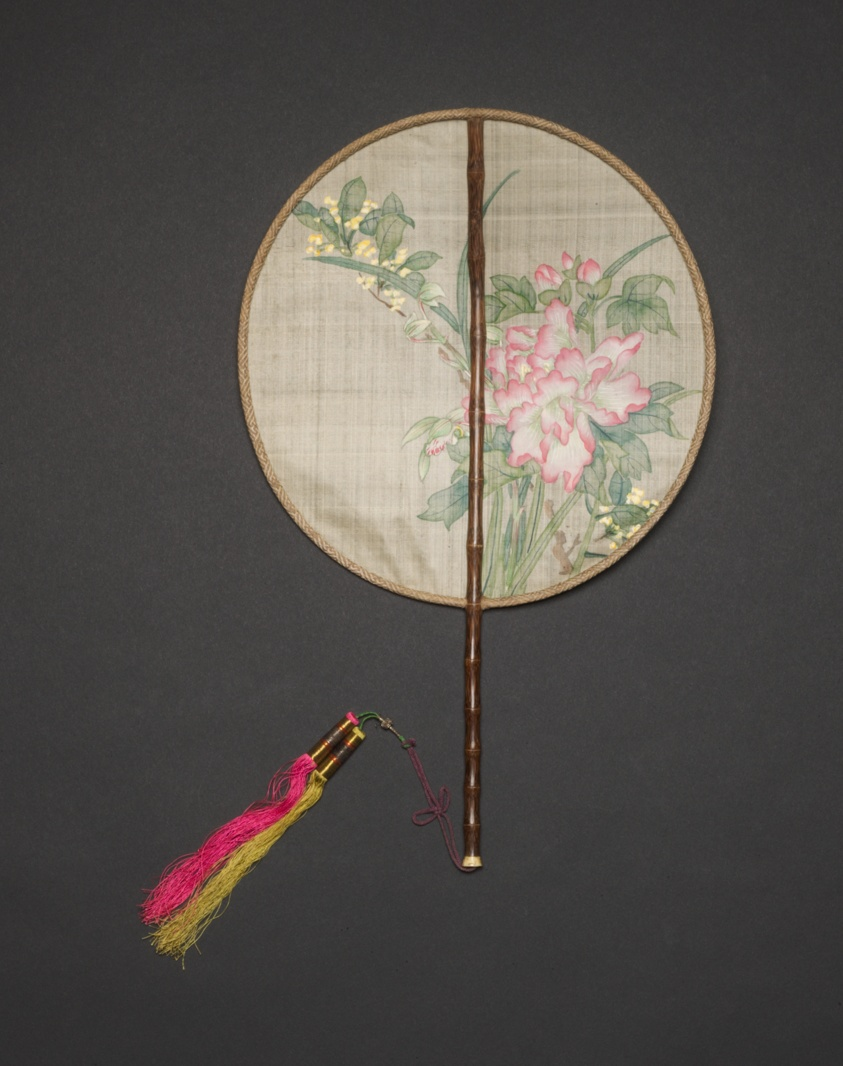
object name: Costume and Accessories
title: Flowers and Leaves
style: Chinese (culture or style)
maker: China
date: Qing dynasty (1644–1911), 19th century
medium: Fan (ovoid); ink and colors on silk, bamboo-style handle, ivory tip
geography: China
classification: fan; accessories (object genre); asian art; costume